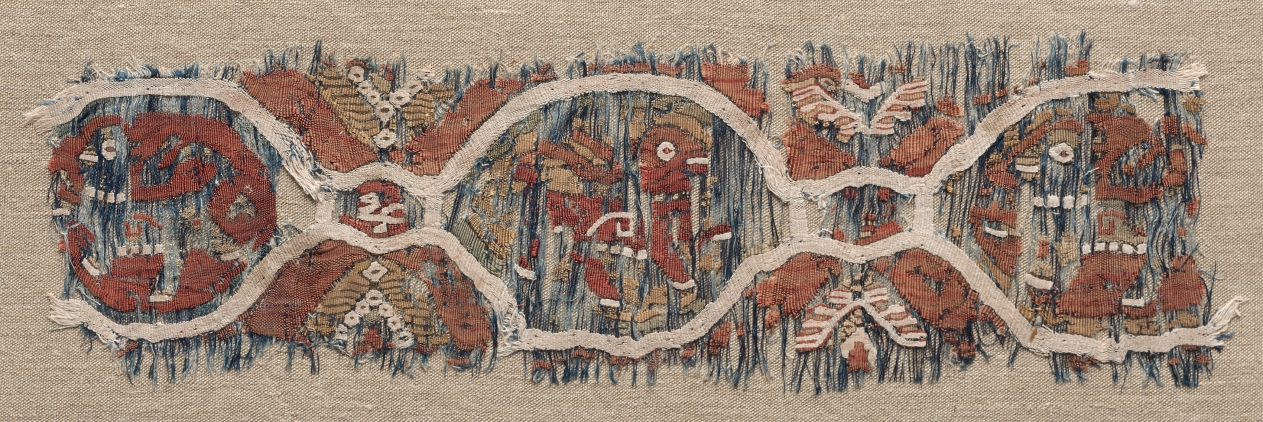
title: Fragment of a Tiraz?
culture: Egypt, Fatimid period (?)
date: 909–1171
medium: tapestry weave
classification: Textile